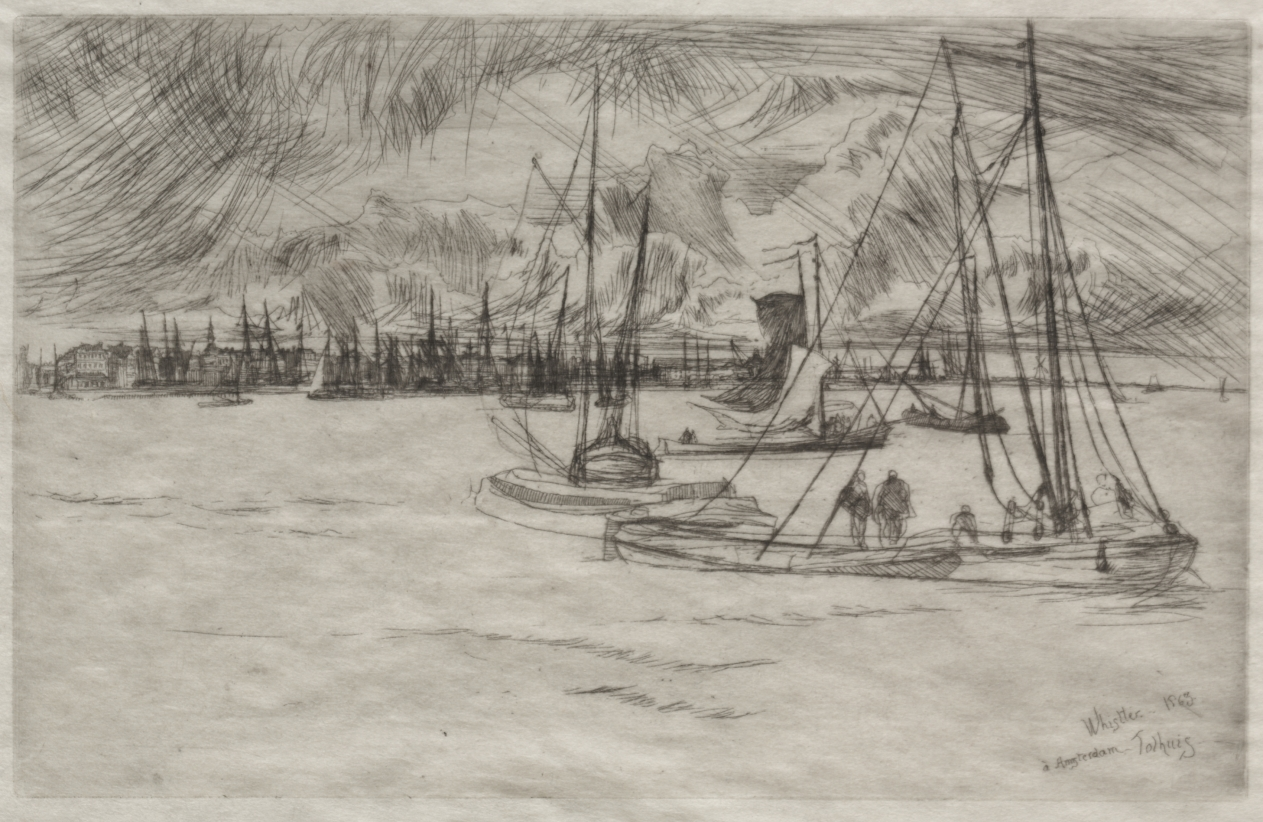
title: Amsterdam from the Tolhuis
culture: America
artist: James McNeill Whistler (American, 1834–1903)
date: 1863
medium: etching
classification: Print